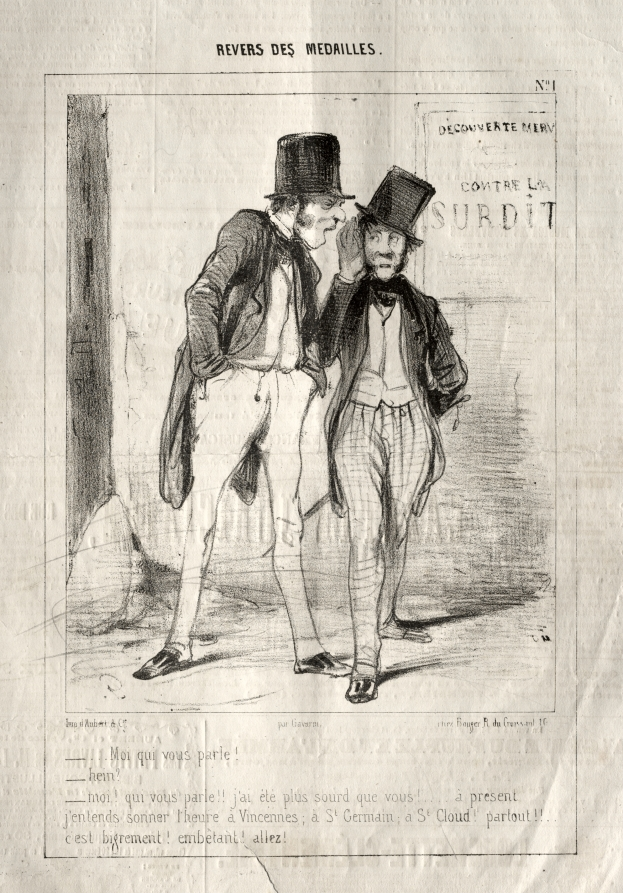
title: Revers des Médailles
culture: France, 19th century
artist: Paul Gavarni (French, 1804–1866)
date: 1842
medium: lithograph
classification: Print